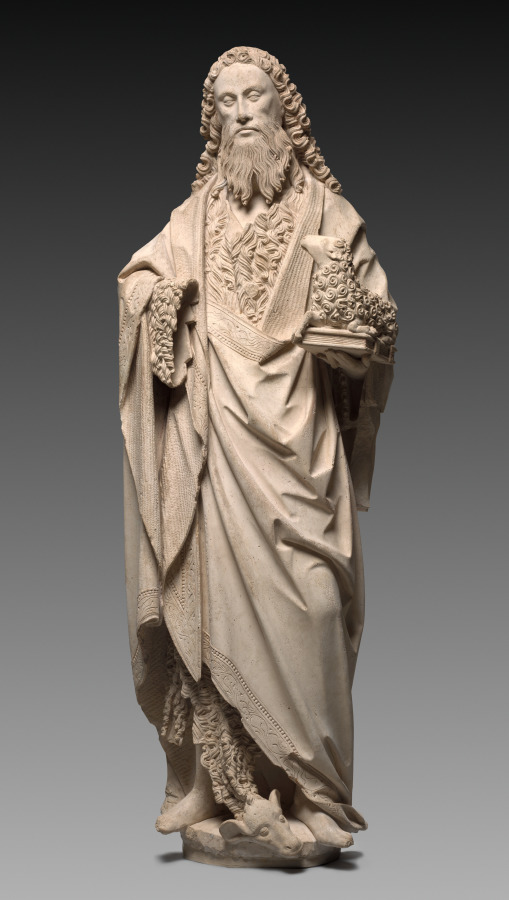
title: Saint John the Baptist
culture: French, Lorraine, Nancy or Bar-le-Duc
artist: attributed to Jan Crocq (Netherlandish, act. 1486–1510)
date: c. 1500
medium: Tonnerre limestone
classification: Sculpture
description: John the Baptist was one of the most beloved and widely venerated saints of the Middle Ages. He is depicted here wearing his traditional camel hair fleece beneath a luxuriant outer mantle. The sculpture is attributed to Jan Crocq, a Netherlandish artist active at the court of René II, Duke of Lorraine at Nancy from 1486 to 1510, and noted for his naturalistic treatment of hair and costume.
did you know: St. John the Baptist holds a book and a lamb, referencing his description of Christ as "the lamb of God."